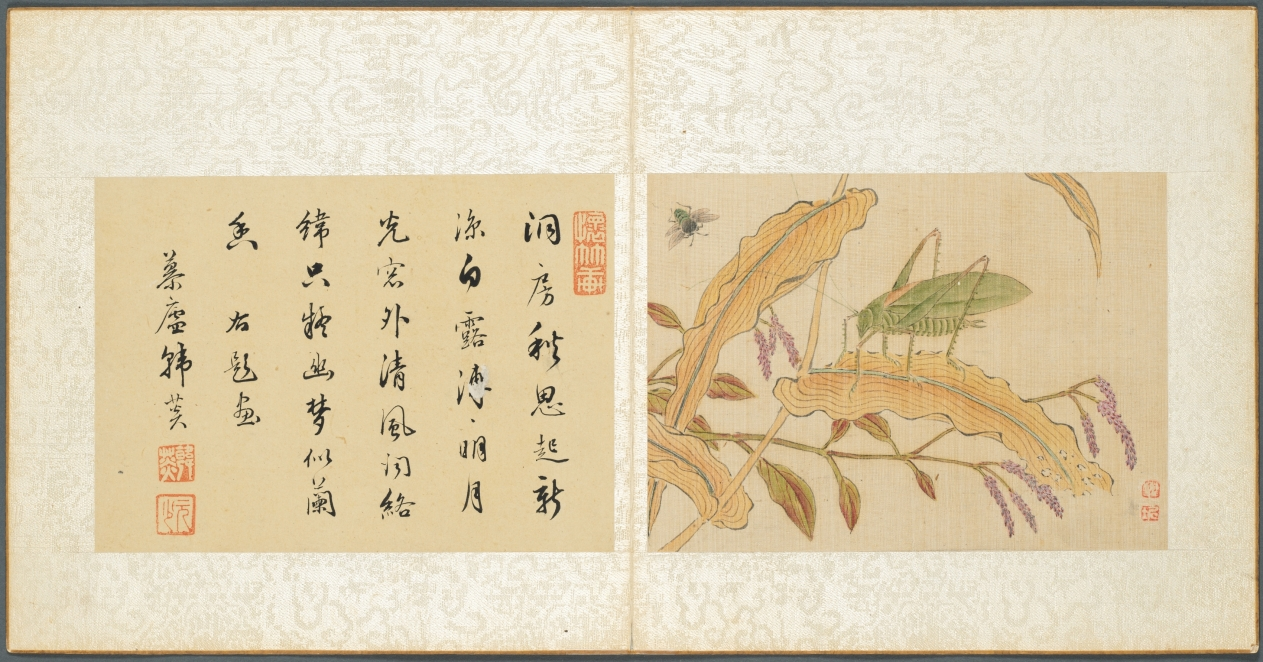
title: Album of Miscellaneous Subjects, Leaf 7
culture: China, Qing dynasty (1644-1911)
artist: Fan Qi (Chinese, 1616–after 1694)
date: early 1650s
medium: album leaf, ink and color on silk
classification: Painting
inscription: Artist seal: Fan Qi 樊圻. Poem by Han Tan 韓菼 (1637–1704): Thoughts of autumn in the nuptial chamber with the new chill arising,/ The white frost all pervasive with a bright moon shining./ Outside the window, a crisp wind conveys the sound of crickets./ Within this quiet dream, I seem to sense the fragrance of orchids.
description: Leaf 7 Han Tan's colophon reads: Thoughts of autumn in the nuptial chamber with the new chill arising, The white frost all persuasive with a bright moon shining. Outside the window, a crisp wind conveys the sound of crickets. Within this quiet dream, I seem to sense the fragrance of orchids.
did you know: The cricket stands on the yellowing leaf of a ripening rice plant.